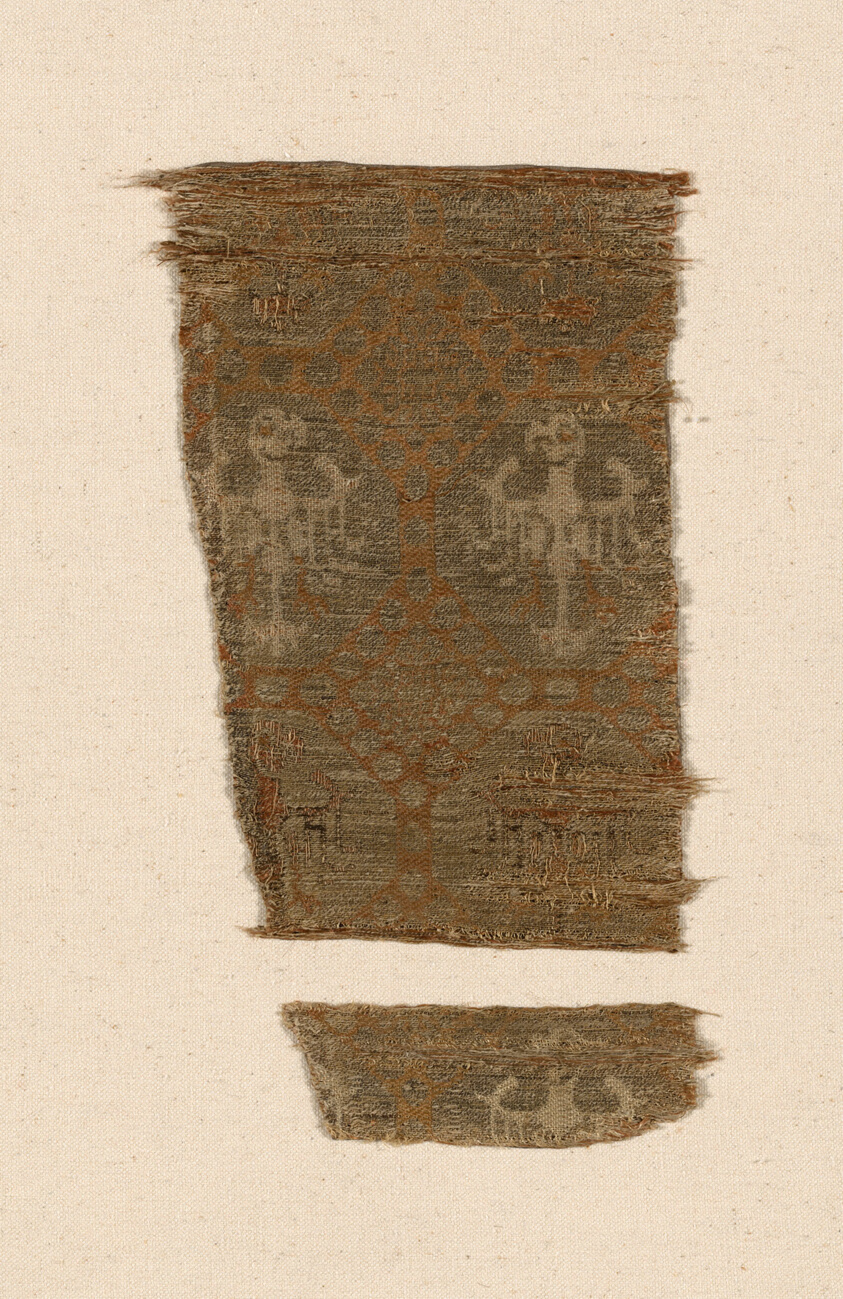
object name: Textile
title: Fragment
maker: Italy or Spain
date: 13th century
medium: Silk and gilt-membrane-wrapped linen, complementary weft twill weave with inner warps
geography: Spain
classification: textile; weaving